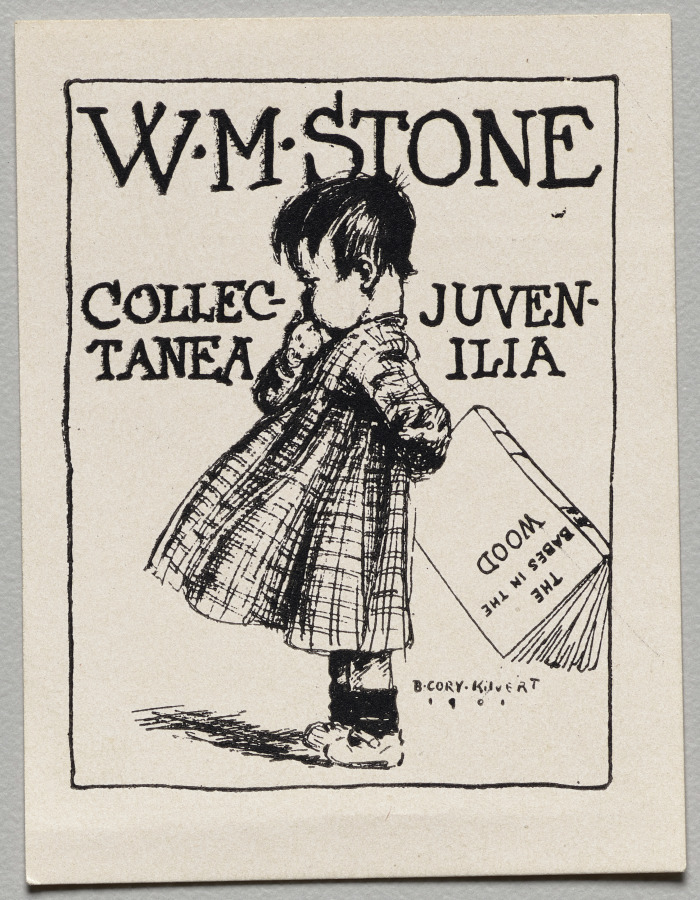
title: Bookplate: William Macey Stone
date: 1901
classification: Print